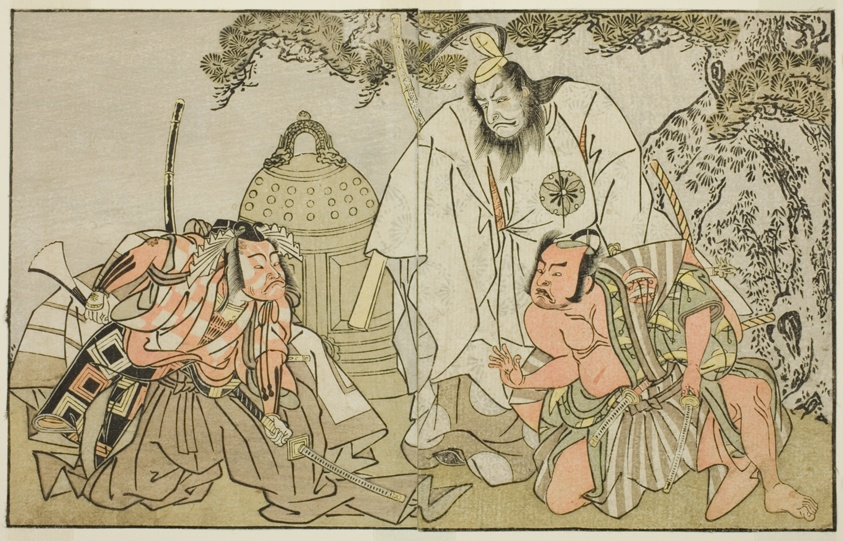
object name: Print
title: The Actors Nakajima Mihoemon II as Aramaki Mimishiro (right), Matsumoto Koshiro II as Otomo no Yamanushi (center), and Ichikawa Danzo III as Hannya no Goro (left), in the Play Kuni no Hana Ono no Itsumoji, Performed at the Nakamura Theater in the Eleventh Month, 1771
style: Japanese (culture or style)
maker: Katsukawa Shunsho 勝川 春章; Japanese, 1726-1792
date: c. 1772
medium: Color woodblock print; from the illustrated book Yakusha Kuni no Hana (Prominent Actors of Japan)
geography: Japan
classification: woodblock print; print; asian art